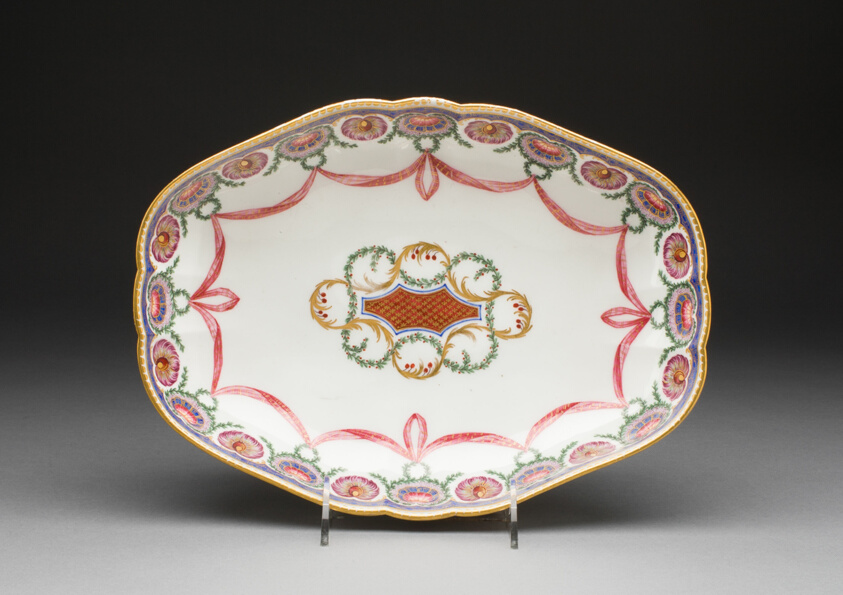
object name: Ceramics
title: Basin (Jatte ovale de pot à l'eau)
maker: Sèvres Porcelain Manufactory; French, founded 1740; Painted by Louis-Jean Thévenet (French, active 1741/45–1777)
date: 1763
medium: Soft-paste porcelain, polychrome enamels, gilding, and gilt-metal mounts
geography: Sèvres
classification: ceramics; european decorative arts; porcelain